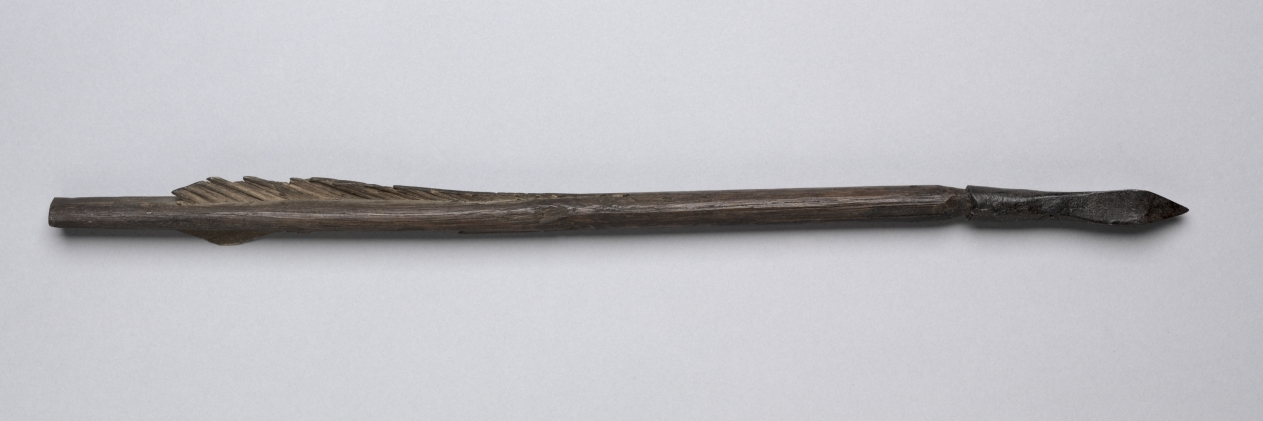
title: Crossbow Bolt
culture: Germany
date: 1500s–1600s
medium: wood, leather, steel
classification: Arms and Armor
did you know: Bolts with leather feathering were used mainly in the Tyrolean area, which includes northern Italy and western Austria.